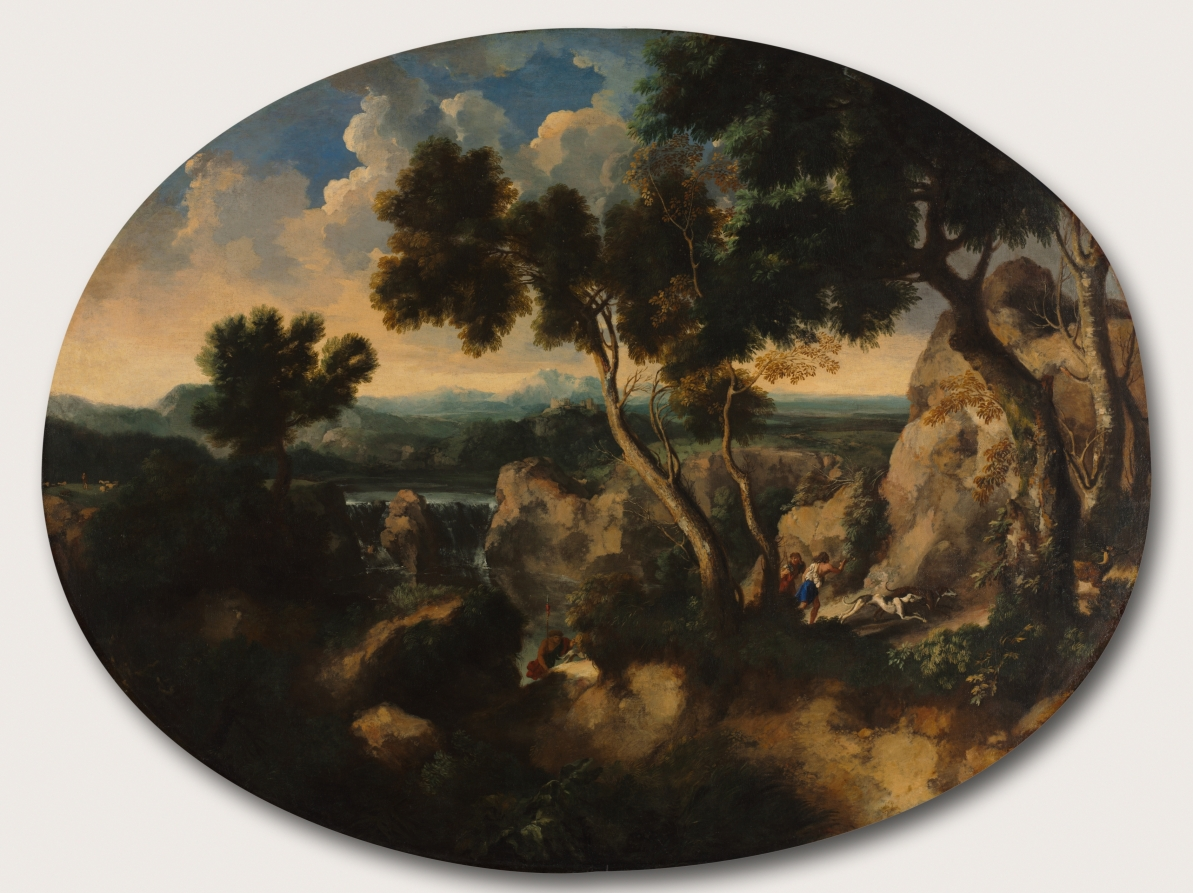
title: Rocky Landscape with Hunters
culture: France, 17th century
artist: Gaspard Dughet (French, 1615–1675)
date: c. 1635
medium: oil on canvas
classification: Painting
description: Dughet spent his whole career in Rome. At the age of fifteen he entered the studio of Nicolas Poussin (1593/94-1665), who married his sister. Dughet concentrated exclusively on landscapes, preferring a rugged type of scenery, widely imitated well into the 18th century.